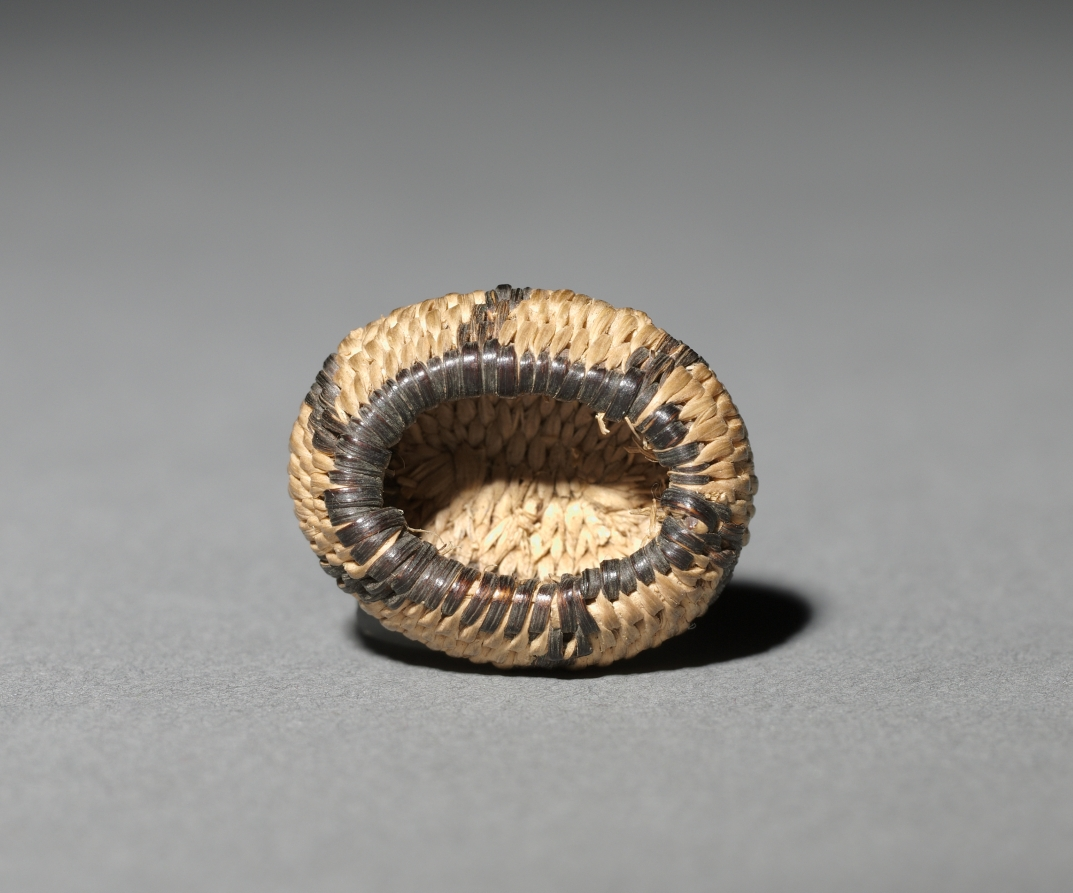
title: Miniature Rhomboidal Basket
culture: California, Pomo, 20th century (?)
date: Early 1900s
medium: coiled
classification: Basketry